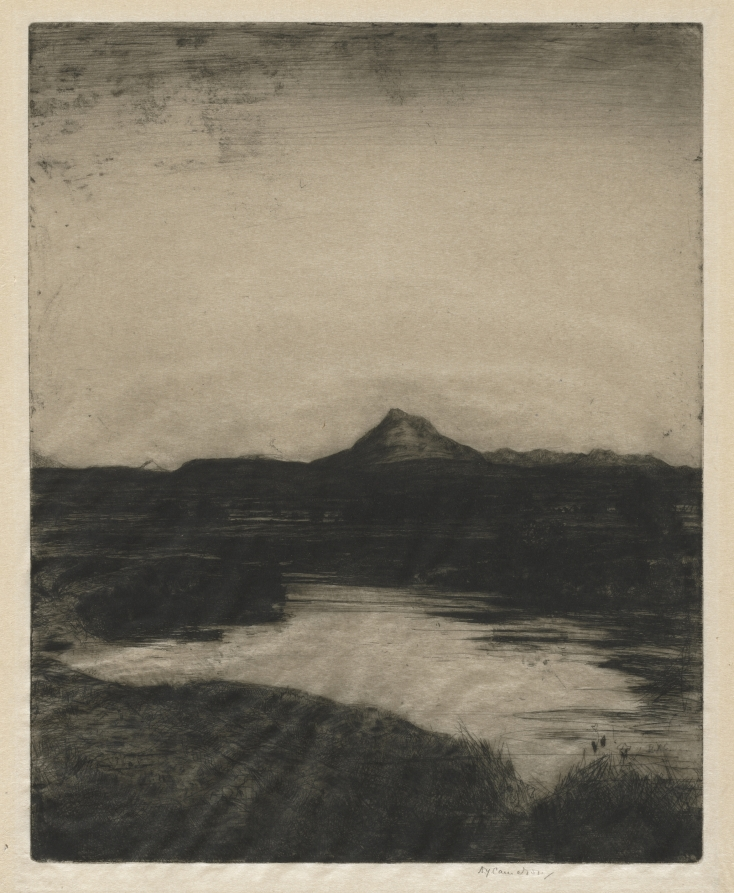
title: Ben Ledi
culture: England, 20th century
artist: David Young Cameron (British, 1865–1945)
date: 1911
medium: etching and drypoint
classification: Print